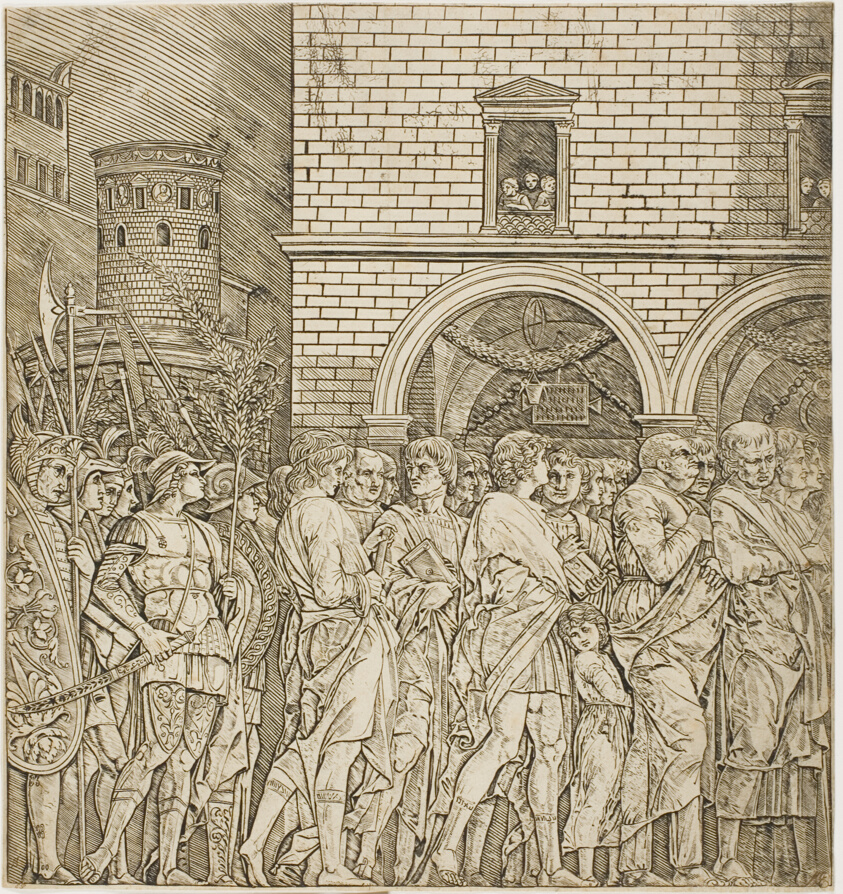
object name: Print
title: The Senators, from Triumph of Caesar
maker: Workshop of Andrea Mantegna; Italian, 1431-1506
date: c. 1495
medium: Engraving in black on cream laid paper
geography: Italy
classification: engraving; print; prints and drawing